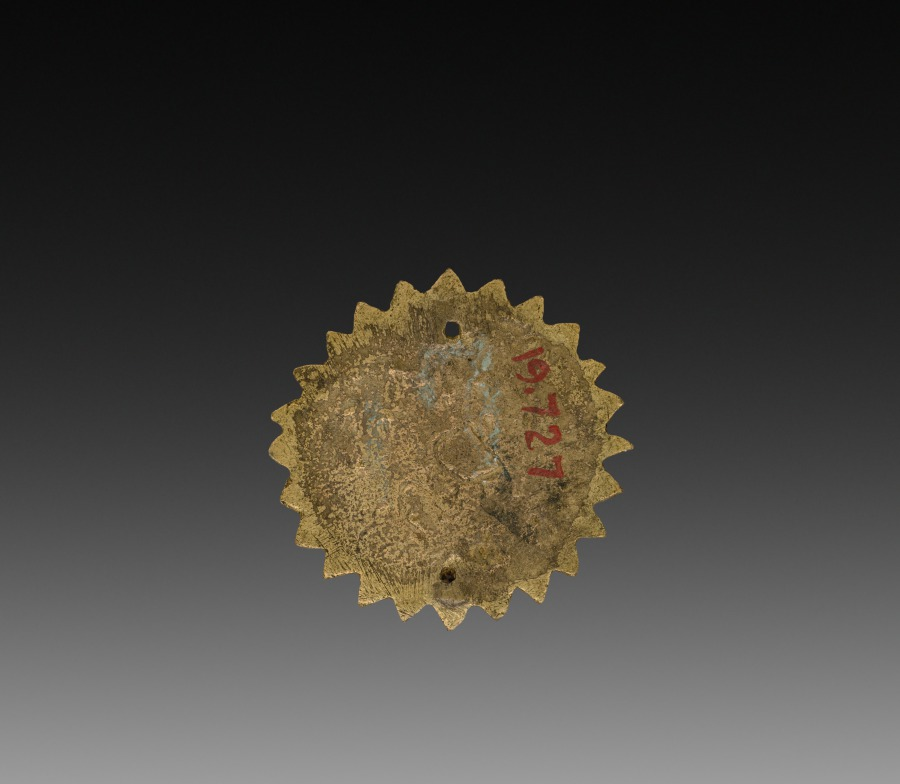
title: Ornamental Rosette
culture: France, late 18th century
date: late 1700s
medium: gilt bronze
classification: Metalwork